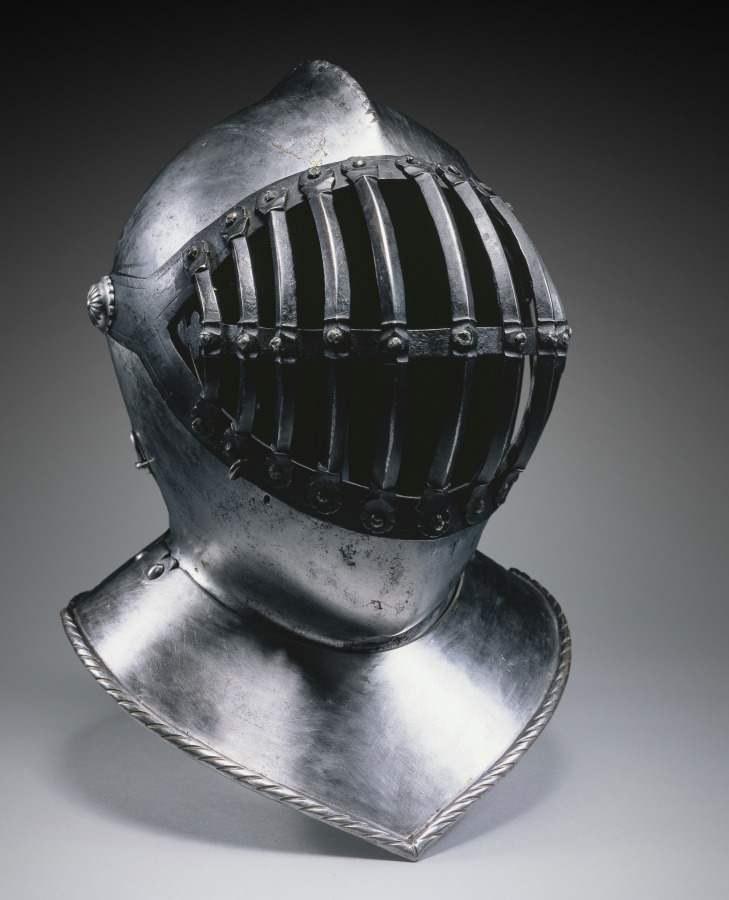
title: Helmet with Barred Visor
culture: England (?), 16th century (visor and neck lames modern, by S.J. Whawell)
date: 1500s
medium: steel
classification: Arms and Armor